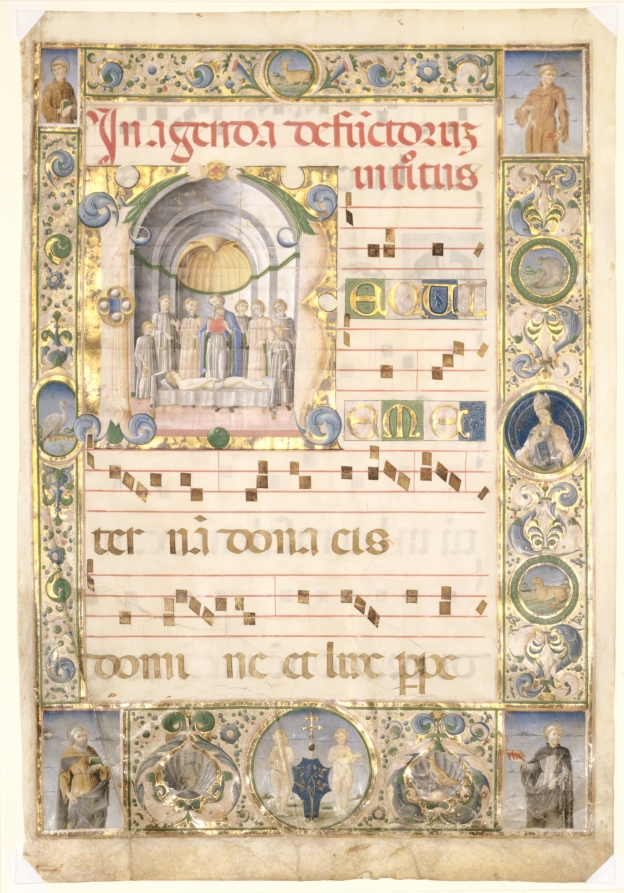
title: Leaf from a Gradual: Initial (R) with Mass for the Dead (recto)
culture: Italy, Ferrara, 15th century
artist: Jacopo Filippo d' Argenta (Italian, 1501)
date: c. 1480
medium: ink, tempera, and gold on parchment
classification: Manuscript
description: This leaf was excised from a volume of a large set of choral books known to have been commissioned by Bartolomeo delle Rovere for Ferrara Cathedral. Delle Rovere, nephew of Pope Sixtus IV, was the Bishop of Ferrara from 1474 to 1494 and his arms appear in the rondel at the bottom of the page: a shield bearing an oak tree (rovere in Italian) surmounted by a patriarchal cross, the symbol of his rank and authority. Payment records indicate that Argenta worked on the choir books for Ferrara Cathedral from 1478 to 1486. The large historiated initial R dominates the extensive decoration including a realistically painted scene in which a priest (center) surrounded by acolytes stands over the body of the deceased as he reads the Office of the Dead. The ceremony takes place within a vaulted chapel that recedes in space to create the illusion of perspective.